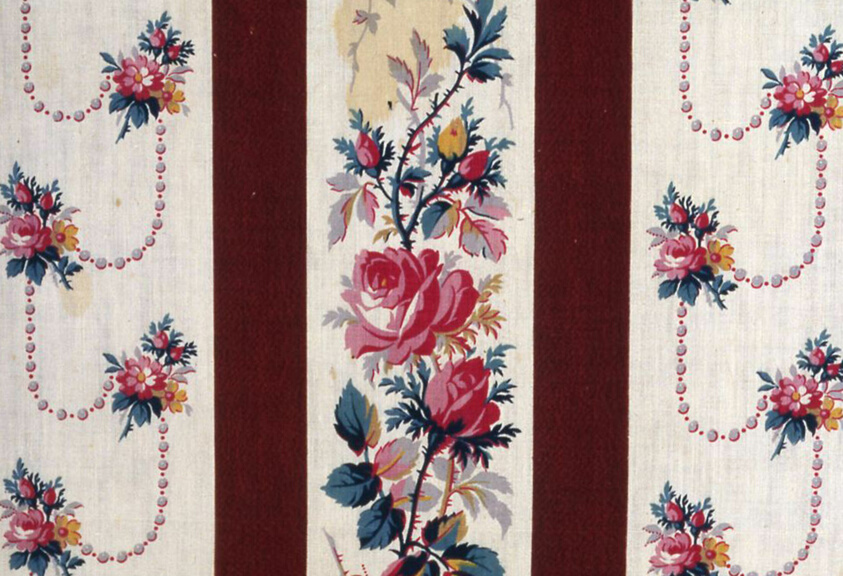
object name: Textile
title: Fragment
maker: France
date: c. 1870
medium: Cotton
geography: France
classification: textile; weaving - printed